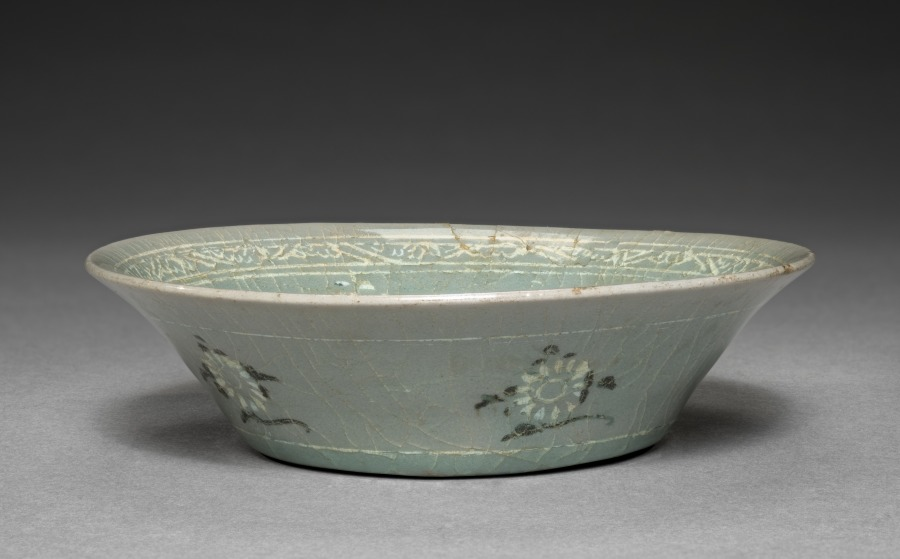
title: Dish with Inlaid Chrysanthemum Design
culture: Korea, Goryeo dynasty (918–1392)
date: 1200s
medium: ceramic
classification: Ceramic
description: Celadon wares used for everyday such as this dish were among the most common burial objects in tombs during the Goryeo period (918–1392). Furnishing tombs with an elaborate assemblage of objects was believed to honor and comfort the newly dead. Generally, Goryeo tombs were left untouched until the late 1800s. During the colonial period (1910–45), however, Japanese archaeologists competitively excavated the tombs located in Kaeseong, the former capital of the Goryeo period, and these wares soon became available for Japanese and Western collectors.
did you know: On the base of this tea bowl, three small spur marks made of bits of clay remain visible, indicating an individual protective casing of fire clay (saggar).